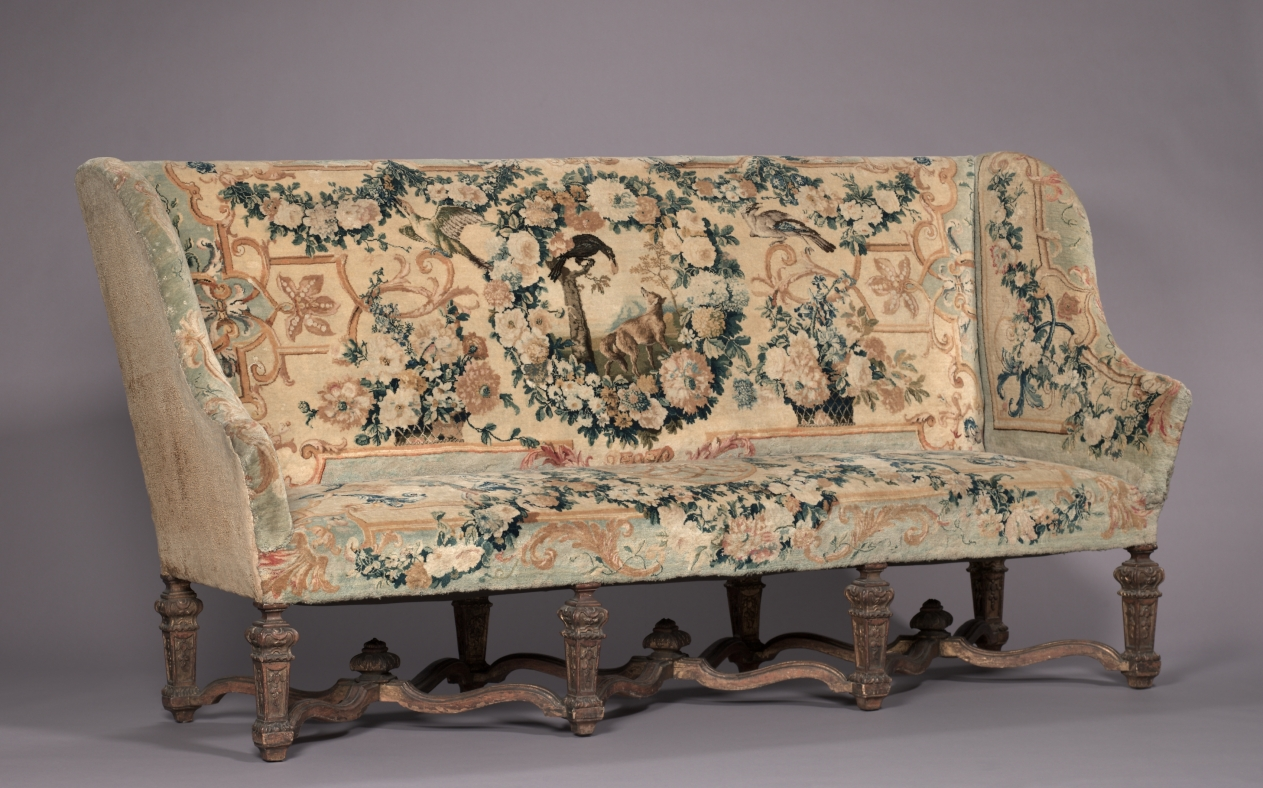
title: Settee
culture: France, 18th century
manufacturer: Royal Savonnerie Manufactory, Chaillot Workshops (French, est. 1627)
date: before 1717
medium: carved wood, Savonnerie knotted-pile (symmetrical rug knot) upholstery; wool, hemp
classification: Furniture and woodwork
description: These chairs belong to a suite that includes a settee (also in the CMA’s collection) and a tapestry made for a count and countess to mark their wedding in 1717. Furniture of this scale was usually placed against the wall in grand reception halls, more as a display of wealth than for use. Upholstered in Savonnerie tapestries, this suite was among the most treasured and expensive example anyone could own and typically reserved for royalty. To add decorative and intellectual interest to the textiles, weavers incorporated symbols depicting various stories from the Fables of Jean de La Fontaine, published from 1668 to 1694 and largely adapted from Aesop and other early storytellers.